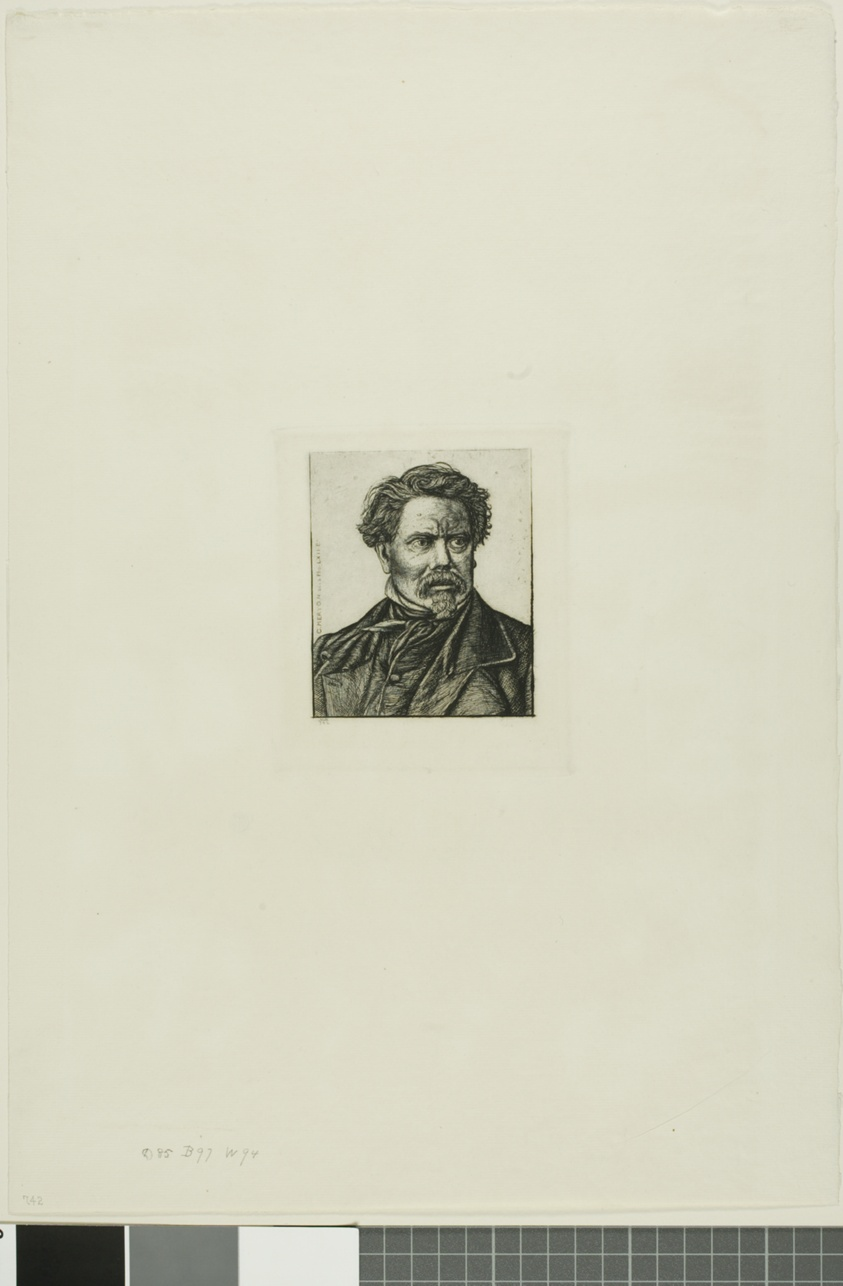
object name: Print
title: Portrait of Benjamin Fillon, Writer and Historian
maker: Charles Meryon (French, 1821-1868)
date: 1862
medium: Etching with drypoint in black on ivory laid paper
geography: France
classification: etching; print; prints and drawing